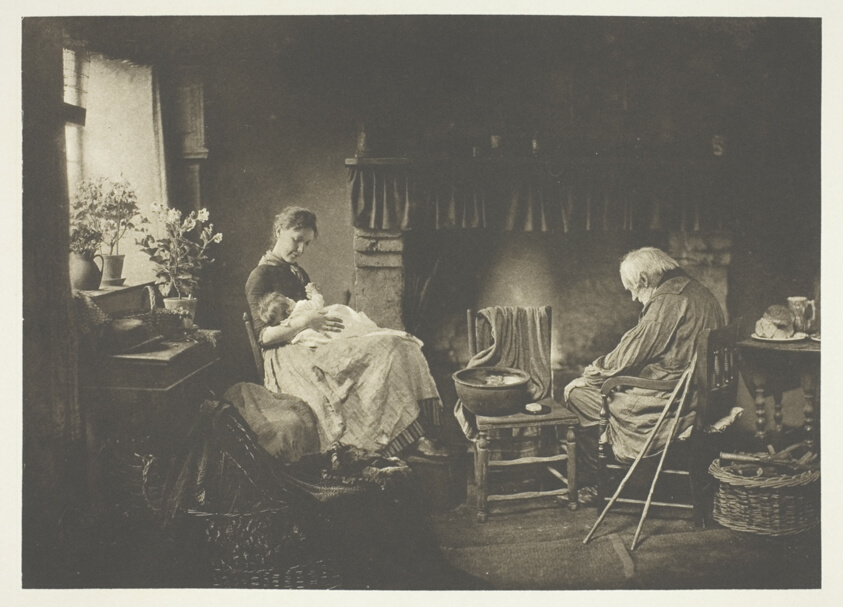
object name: Photograph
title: Dawn and Sunset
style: Pictorialism, 19th century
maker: Henry Peach Robinson (English, 1830–1901)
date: 1885, printed January 1890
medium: Photogravure, from "Sun Artists, Number 2" (1890)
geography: England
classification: photogravure; photomechanical process; photography; photograph